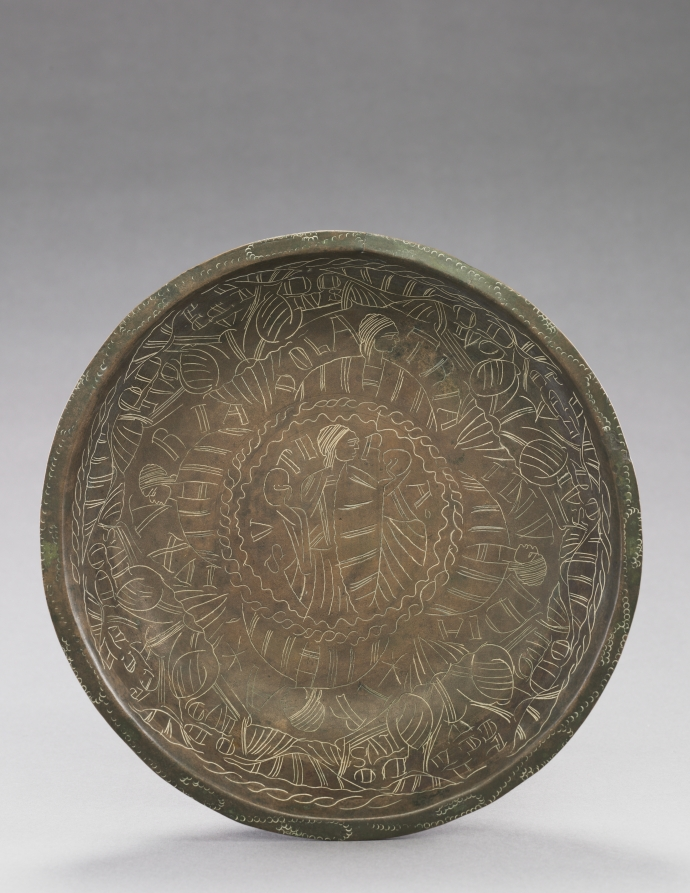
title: Bowl with Engraved Figures of Vices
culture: Germany, Gothic period, 12th century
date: 1150–1200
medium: bronze: spun, hammered, chased, and punched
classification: Metalwork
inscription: at the center of the bowl is a standing female figure with engraved identification: "SVPERBIA" (Pride); along the inner curvature are four bust-length figures with engraved names: "IDOLATRIA" (Idolatry), "INVIDIA" (Envy), "IRA" (Anger); and "LVXVRIA" (Self-Indulgence).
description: At the center of this bowl stands a female figure identified as SUPER[BI]A (pride). Represented along the curvature are four more bust-length figures: [I]DOLATRIA (idolatry), INVIDIA (envy), IRA (anger), and LUXURIA (self-indulgence). Bowls of this type were likely produced in medieval Germany and widely traded throughout northern Europe. Because of the moralistic symbolism employed in their iconographic programs, it has been suggested that such bowls were used in monasteries for hand washing during penitential activities. More recently, it has been suggested that they served as teaching aids for rhetorical instruction in medieval classrooms.